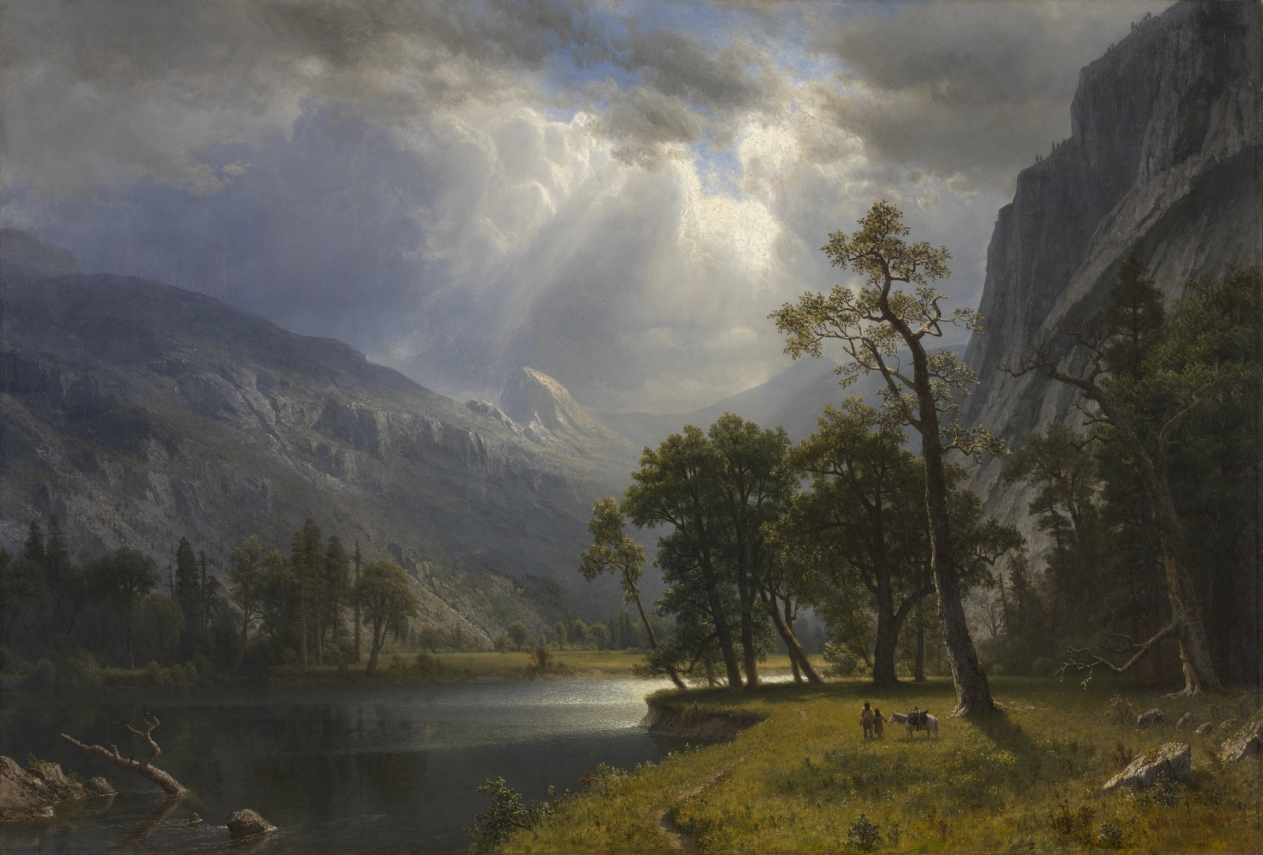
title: Mount Starr King, Yosemite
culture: America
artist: Albert Bierstadt (American, born Prussia [now Germany], 1830–1902)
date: 1866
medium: oil on canvas on panel-back stretcher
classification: Painting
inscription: signed lower right: ABierstadt. / 66 [AB in monogram]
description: During the summer of 1863, Bierstadt visited Yosemite Valley in California and made numerous sketches. Back in his New York studio, he used them to produce many majestic paintings, including this view of the distant granite peak Mount Starr King. Such scenes thrilled East Coast audiences and helped encourage early movements to safeguard natural wonders. In 1864, President Lincoln signed a bill preserving Yosemite as public property; it became a national park in 1890. Bierstadt included two Native Americans with a packhorse in his composition, and their presence references the fact that Indigenous peoples had inhabited or seasonally visited the region for millennia. Over time, various government and military agencies dispossessed them of these ancestral lands. Although no longer residents in the national park, descendants of the seven Indigenous nations with ties to Yosemite persevered to live in neighboring areas.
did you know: Highly successful, Bierstadt built a mansion and named it Malkasten, a German word meaning “paintbox.”